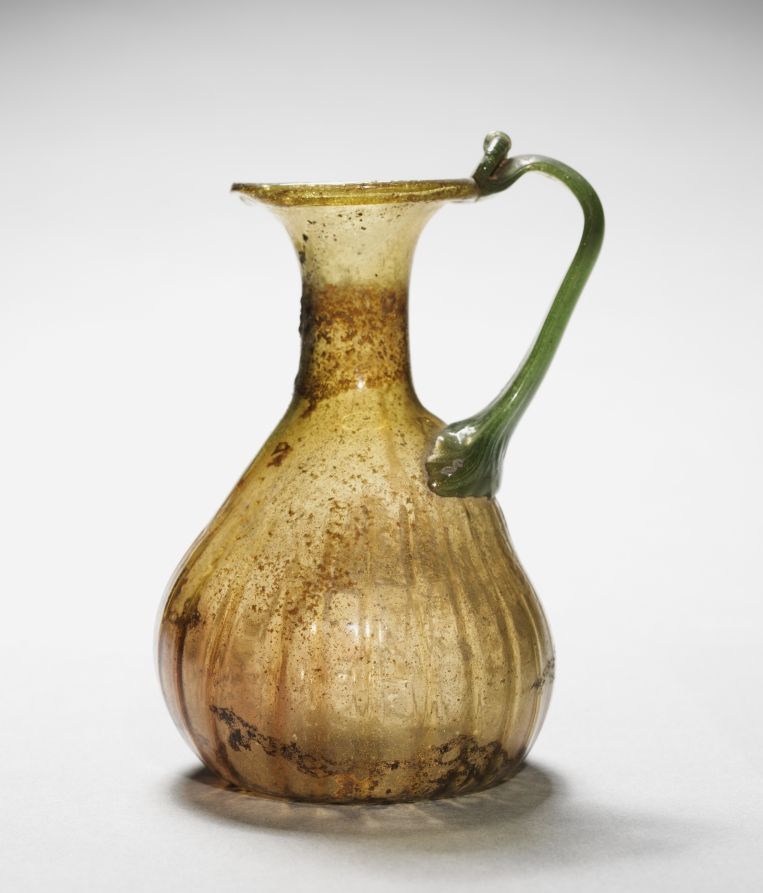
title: Pitcher with Handle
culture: Syro-Palestinian, Roman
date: 300s CE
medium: glass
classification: Glass